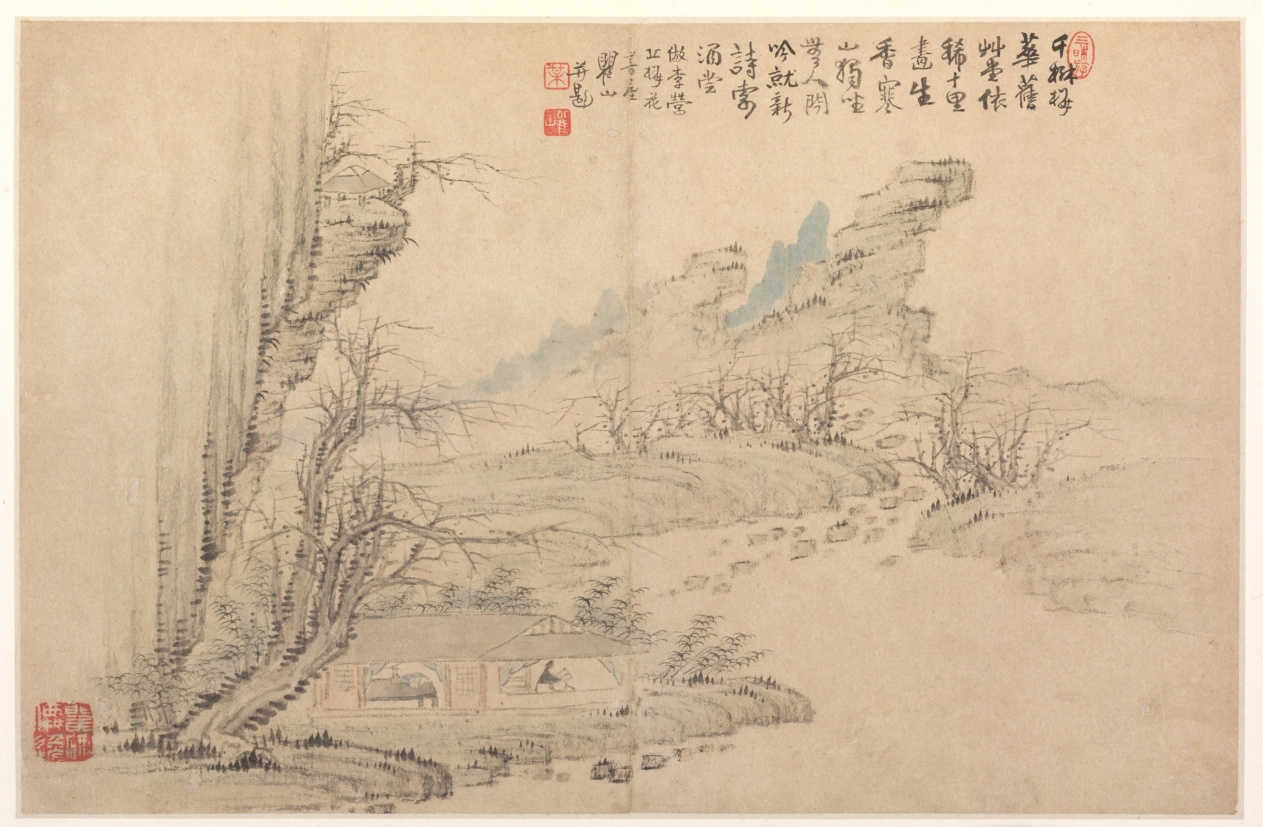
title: Landscapes in Various Styles after Old Masters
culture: China, Qing dynasty (1644-1911)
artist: Mei Qing (Chinese, 1623–1697)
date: 1690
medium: album leaf: ink and color on paper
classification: Painting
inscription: Spring Leaf I (formerly Leaf A). Artist's inscription, signature, and seals: [seal] Sanmei you. Prunus blossoms from a thousand trees and an old hut-/ The painting seems filled with their fragrance for a distance of ten miles./ In the wintry mountains I sit alone without company;/ Having just finished a new poem, I think I'll taste some wine. Imitating Li Yingqiu's [Li Cheng] "Prunus-Blossom Study." Qushan [painted] and inscribed. [2 seals] Mei; Qushan [seal, lower left corner] Quxing hsien-i.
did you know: Mei Qing produced a surge of new paintings after his 1690 tour of Huangshan’s breathtaking peaks.